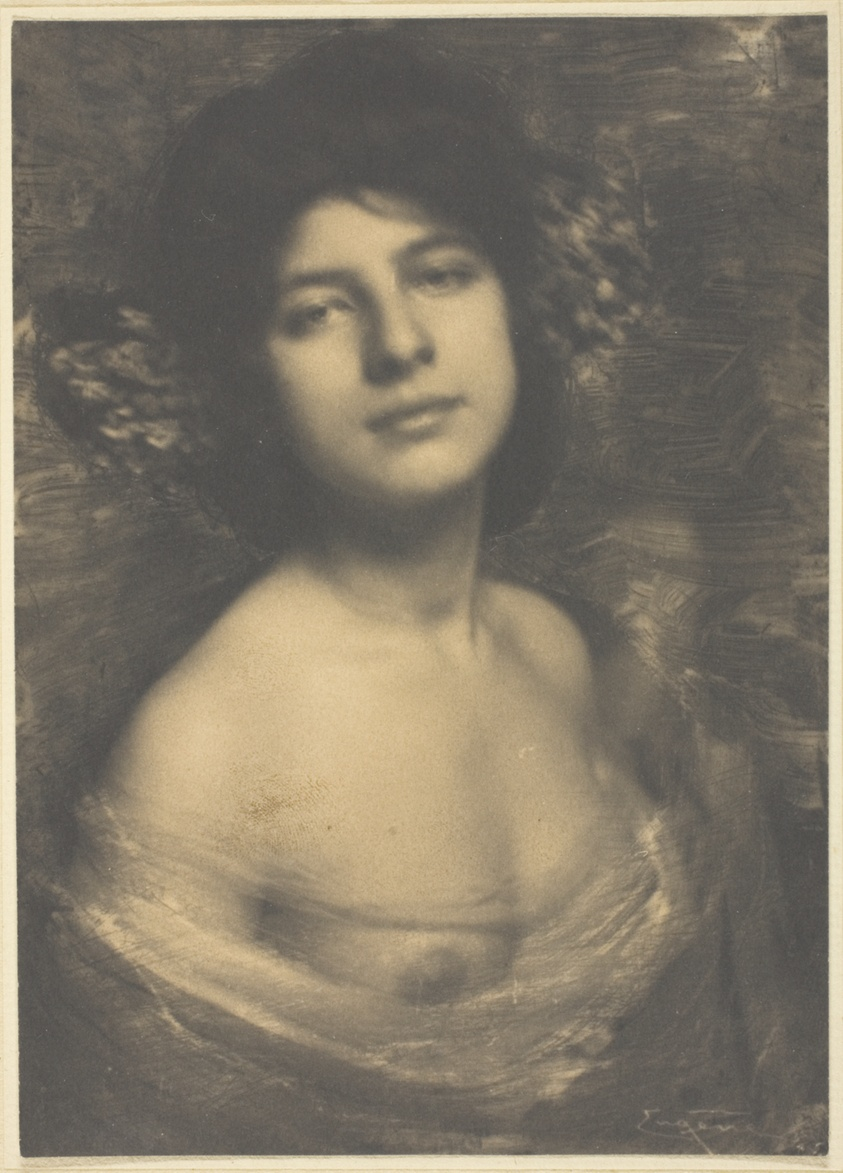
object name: Photograph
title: Hortensia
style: Pictorialism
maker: Frank Eugene (American, 1865–1936)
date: 1898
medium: Platinum print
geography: United States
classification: platinum print; photographic process; photography; photograph